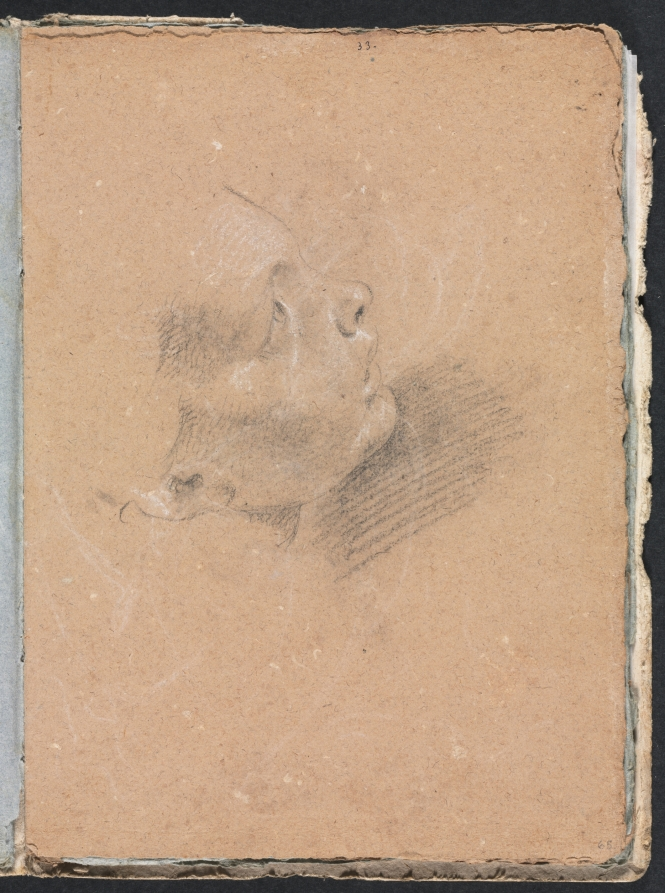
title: Verona Sketchbook: Female profile (page 65)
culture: Italy, 18th century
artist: Francesco Lorenzi (Italian, 1723–1787)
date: 1760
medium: black chalk with white heightening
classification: Bound Volume